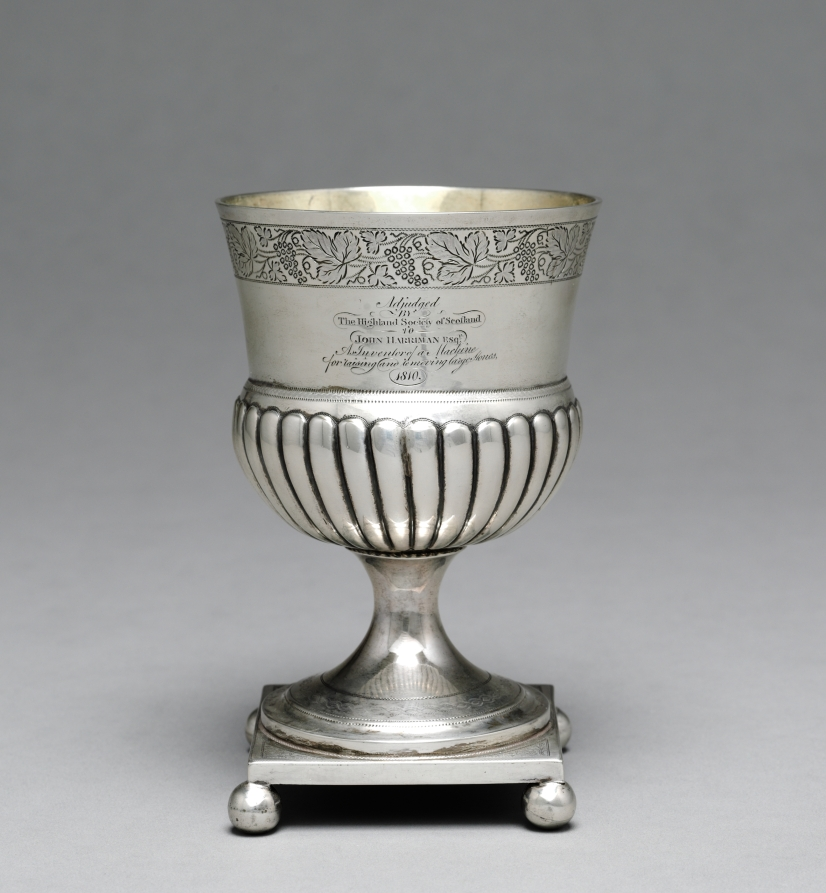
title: Silver Cup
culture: Scotland, Edinburgh, 19th century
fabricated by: George Fenwick (Scottish)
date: 1809–1810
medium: silver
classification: Silver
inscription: "Adjudged/ By/ The Highland Society of Scotland/ to/ John Harriman Esqr./ as Inventor of a Machine/ for raising and removing large stones/ 1810."